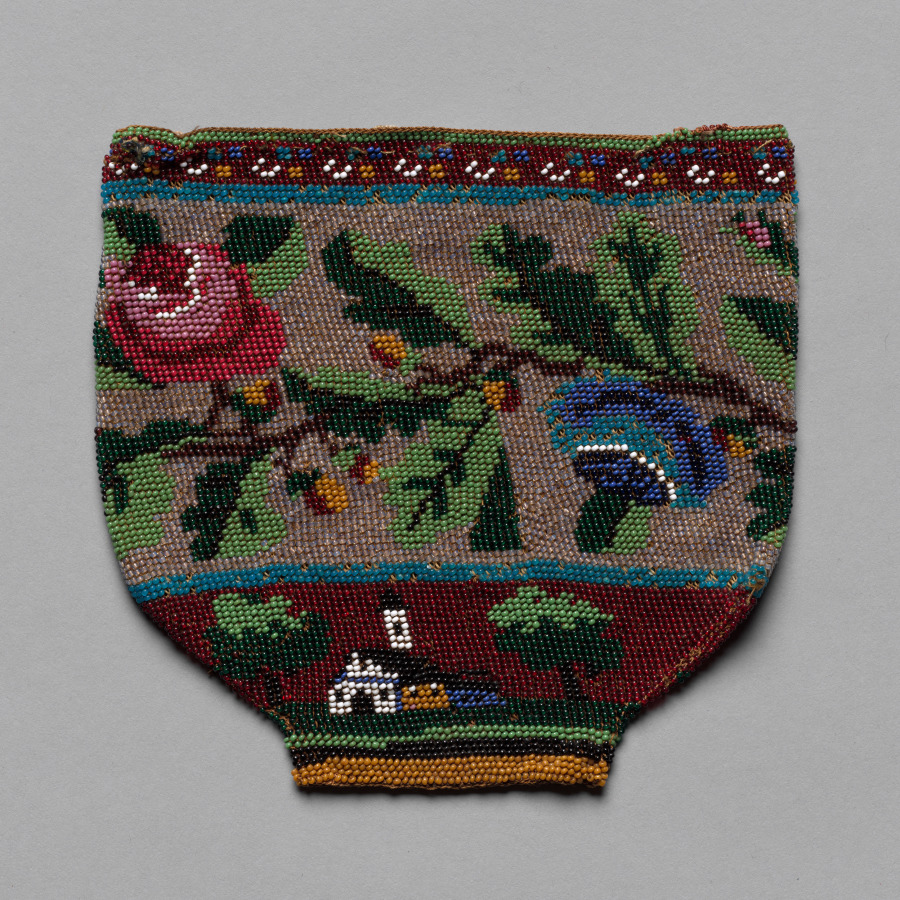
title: Beaded Bag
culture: America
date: c. 1835–1840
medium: crocheted, with beads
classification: Garment